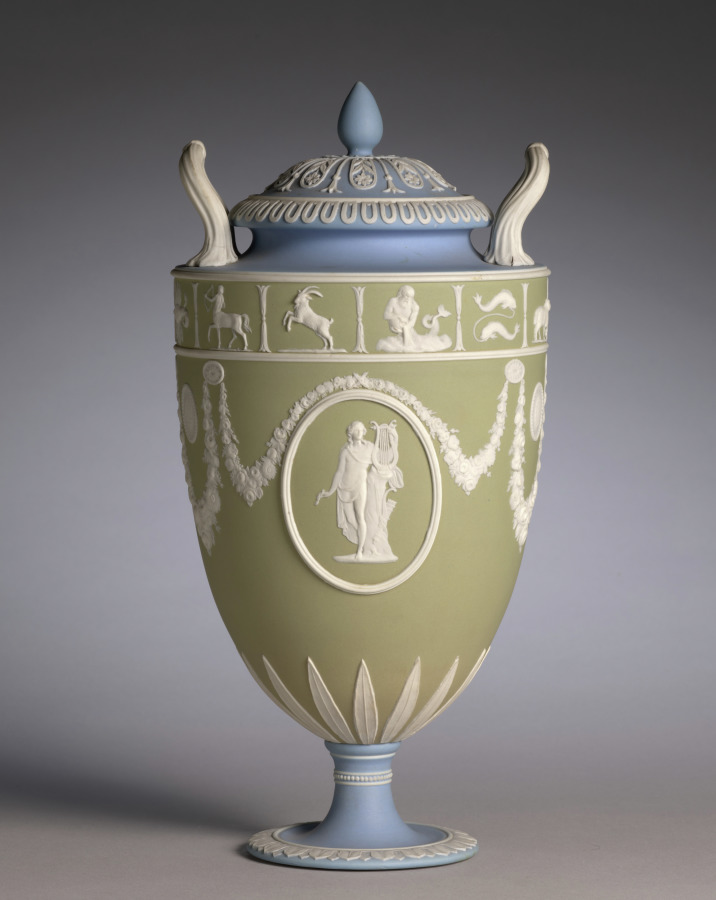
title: Covered Vase (one of a pair)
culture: England, Staffordshire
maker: Josiah Wedgwood and Sons (British, Staffordshire, est. 1759)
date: c. 1850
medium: jasper ware with relief decoration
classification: Ceramic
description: Wedgwood's tricolor jasperware first became popular in the 1770s during a period of fascination with neoclassical decoration. This vase was probably made around 1850 during the period when this type of decoration was revived. The relief medallions depict two versions of the Greek god Apollo, the god of music, next to his harp or lyre.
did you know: Signs of the zodiac form a decorative border around the upper portion of this vase.